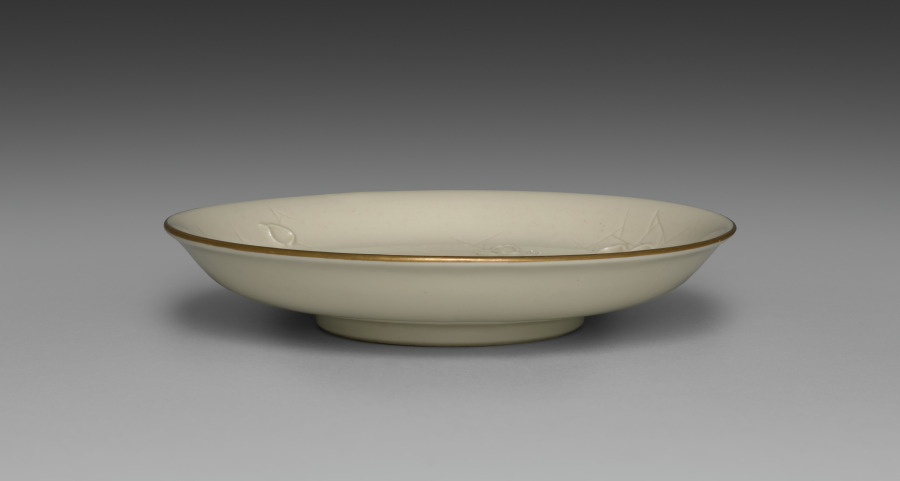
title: Medium-sized Dish from Dining Set with Plum Blossoms and Cracked-Ice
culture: Japan, Meiji period (1868–1912)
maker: Seifū Yohei II (Japanese, 1844–1878)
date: c. 1875–78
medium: Porcelain with molded designs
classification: Ceramic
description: Each item in this set has a delicate low-relief design of flowering plum branches over scattered, intersecting lines meant to resemble the cracked-ice surface of a frozen body of water and is signed on the base in gold pigment. While Yohei II produced many fine works in underglaze blue, like those produced by Kiyomizu Shichibei, he also made works in quite different styles later in his career, from the early 1870 s. In 1873, he was appointed purveyor to the Industrial Center of Kyoto Prefecture, a designation associated with Kyoto’s efforts to reach an international market through the port of Kobe; and from 1875 until his death, he was involved in national-level projects to present Japanese ceramics across the world. It was during this period that Yohei III was apprenticed to Yohei II, and it has been suggested that this set may in fact be an early example of Yohei III’s work, which he signed with his teacher’s name. Decorated with flowers resembling Japanese textile motifs, the set calls to mind the design of Yohei II’s pair of vases with plum blossoms in the Victoria and Albert Museum. Here, the elaborate trees created for a formal public exhibition setting have been translated into the approachable blossoms of the genteel domestic environment. While the designs are consistent across the pieces, each raised flower petal and pistil and each incised line in the ice was done by hand, so the cups, bowls, and dishes are similar yet unique. The bottoms of two boxes once identified the set’s owner, but the information has been deliberately obscured with black ink. However, inscriptions still visible appear to indicate two occasions, once at the end of July 1886 , and once again in June 1916 , when parts of the set were requested from Hokura in Niigata Prefecture. The location corresponds to a neighborhood in the present-day city of Jōetsu. The surname Tsuji 辻 also appears on a paper tag affixed to one of the box cloths. Future research may possibly reveal more about their provenance. A vase by Yohei III in a private collection combines the formal grandeur of the Yohei II vases in the Victoria and Albert Museum with the gentler design of this dining set, placing flowering plum trees against soft, scalloped-edge clouds resembling those in golden screens.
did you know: The dining wares have a creamy white coloration that the four boxes containing them identify as Korean in style.